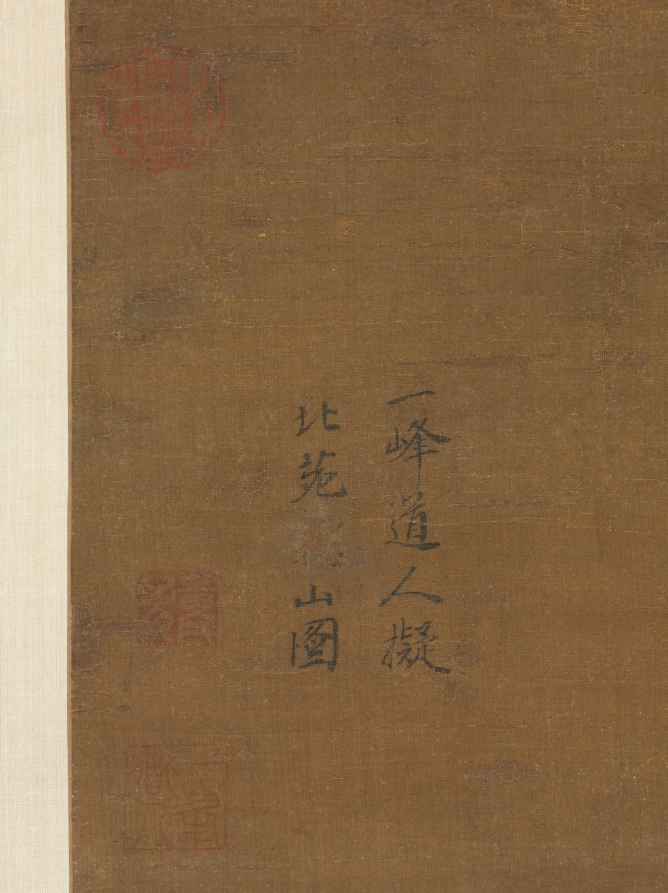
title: Summer Mountains (after Dong Yuan [active c. 937–75])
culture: China, Yuan dynasty (1271-1368)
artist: attributed to Huang Gongwang (Chinese, 1269–1354)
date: 1290–1354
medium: hanging scroll; ink and slight color on silk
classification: Painting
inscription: 【印】一峰道人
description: This monumental landscape is drawn in softly rounded strokes with darker lines frequently applied on top of lighter ones. This technique recalls one of the suggestions included in a collection of the artist's writings known as Secrets of Landscape Painting: The most difficult thing in painting is using the ink. The artist begins by using dilute ink and builds it up to the point where it begins to look right, then uses dense, black ink, applied fairly dry, and washes of deeper-toned ink. This technique distinguishes the fields from the paths, the far from the near. Huang Gongwang may have learned this technique from observing nature through the eyes of an earlier master, Dong Yuan, a painter whose style he shared.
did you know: The wet hills and moist, rich atmosphere evoke the southern Chinese summer, characterized by monsoon rains and lush growth.